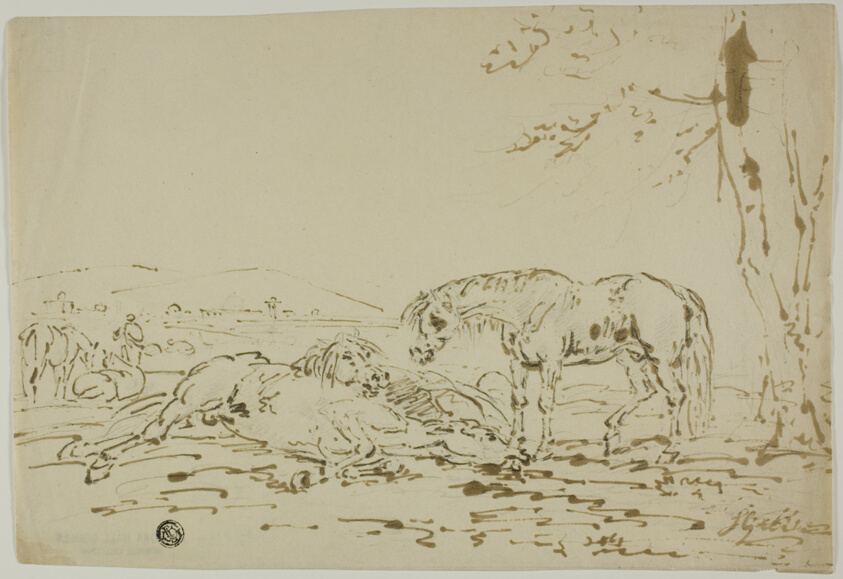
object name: Drawing and Watercolor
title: Landscape with Horses in Foreground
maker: Sawrey Gilpin (English, 1733-1807)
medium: Pen and pale brown ink, over graphite, on cream wove paper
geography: England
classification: pen and ink drawings; drawings (visual works); prints and drawing